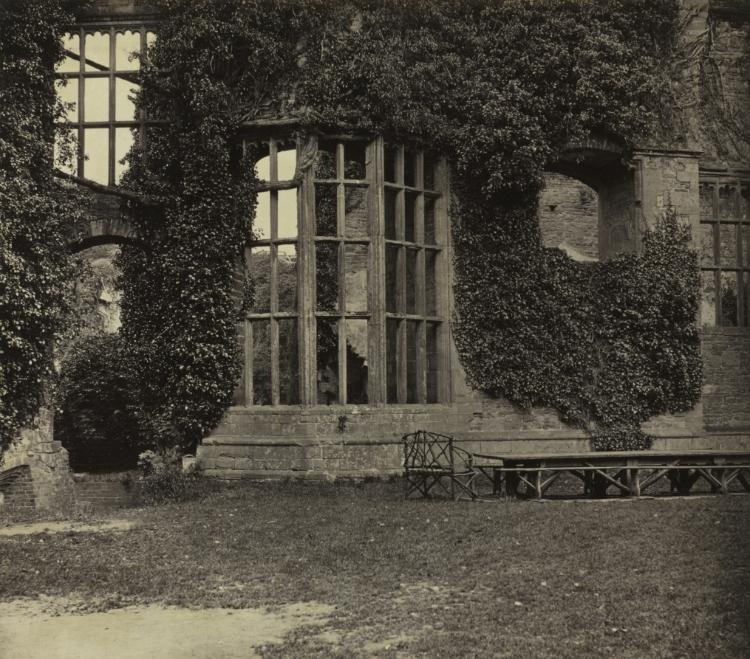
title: At Raglan Castle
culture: England, 19th century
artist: F.D. (British)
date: c. 1858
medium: albumen print from wet collodion negative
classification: Photograph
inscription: Signed in pencil: "F D [last name is unclear]"